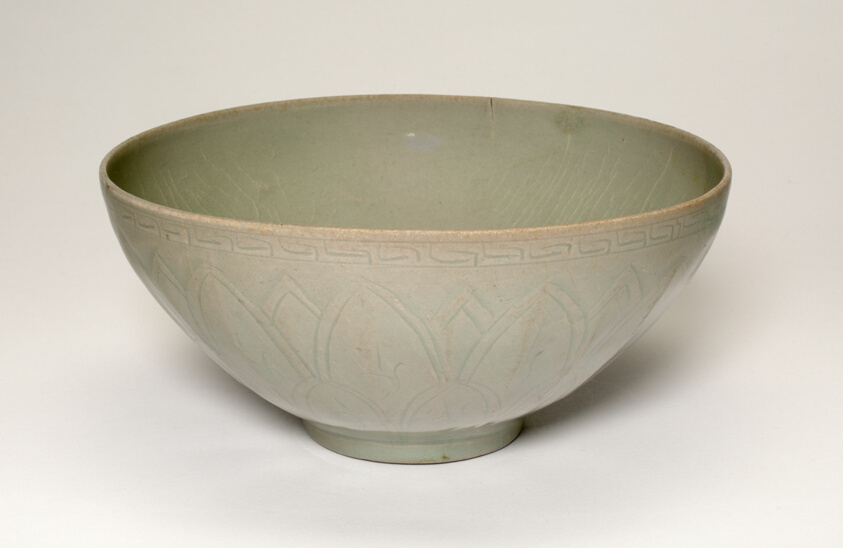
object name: Decorative Arts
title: Bowl with Lotus Design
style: Korean (culture or style)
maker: Korea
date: Goryeo dynasty (918–1392), mid–12th century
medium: Celadon-glazed stoneware with underglaze incised decoration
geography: Korea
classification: bowl; dish (vessel); asian art; ceramics; decorative arts